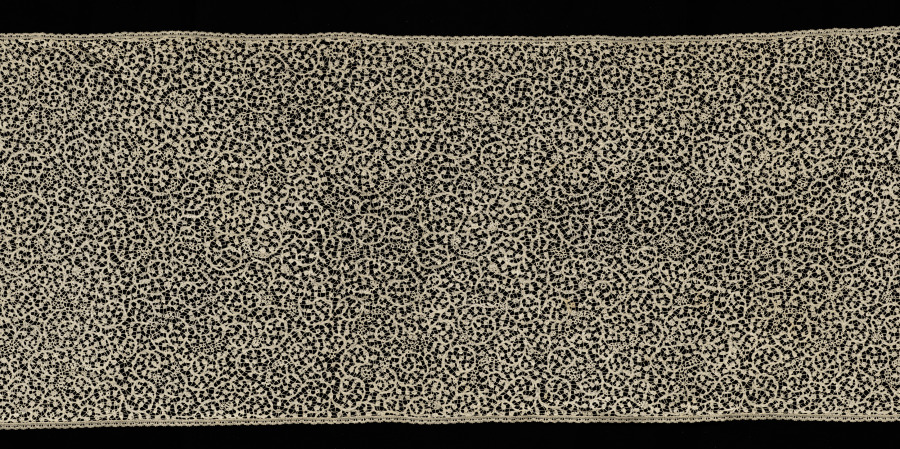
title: Lace Flounce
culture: Flanders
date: 1700s–1800s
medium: Linen: bobbin lace (resembles coralline point)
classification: Lace